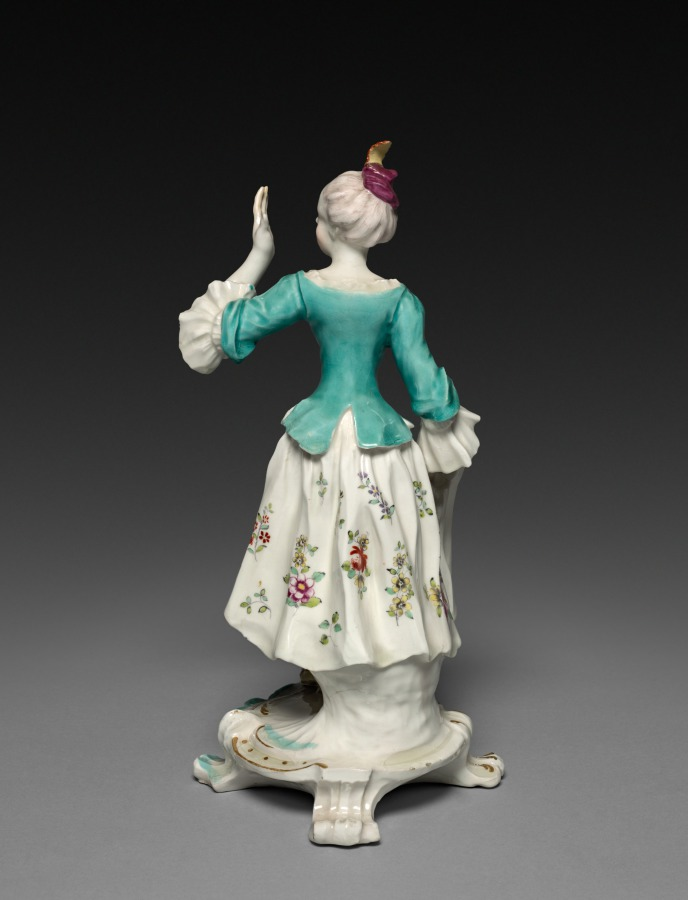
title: Dancer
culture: England, Derby, 18th century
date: c. 1760–1765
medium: soft-paste porcelain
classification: Ceramic